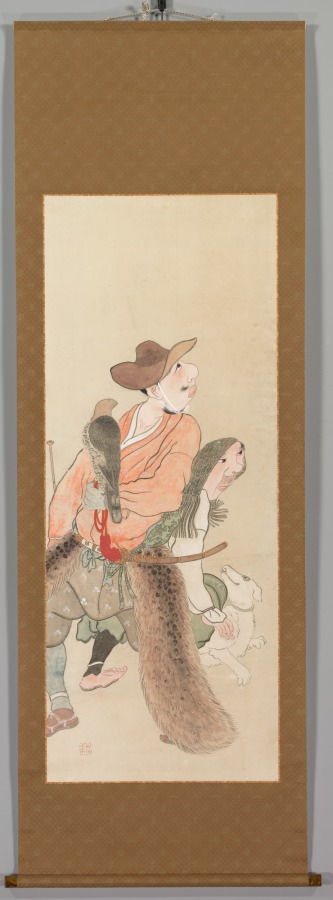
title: Genre Figures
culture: Japan, Edo period (1615–1868)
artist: Takebe Sōchō (Japanese, 1760–1814)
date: c. 1816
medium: hanging scroll; ink and color on paper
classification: Painting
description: Though rarely mentioned in official histories, Socho was an accomplished painter whose talent is readily apparent to the modern eye. For his compositions he chose traditional Japanese stories or everyday events. This painting belongs to a triptych (set of three) that was recently converted from folding screen panels to hanging scrolls.